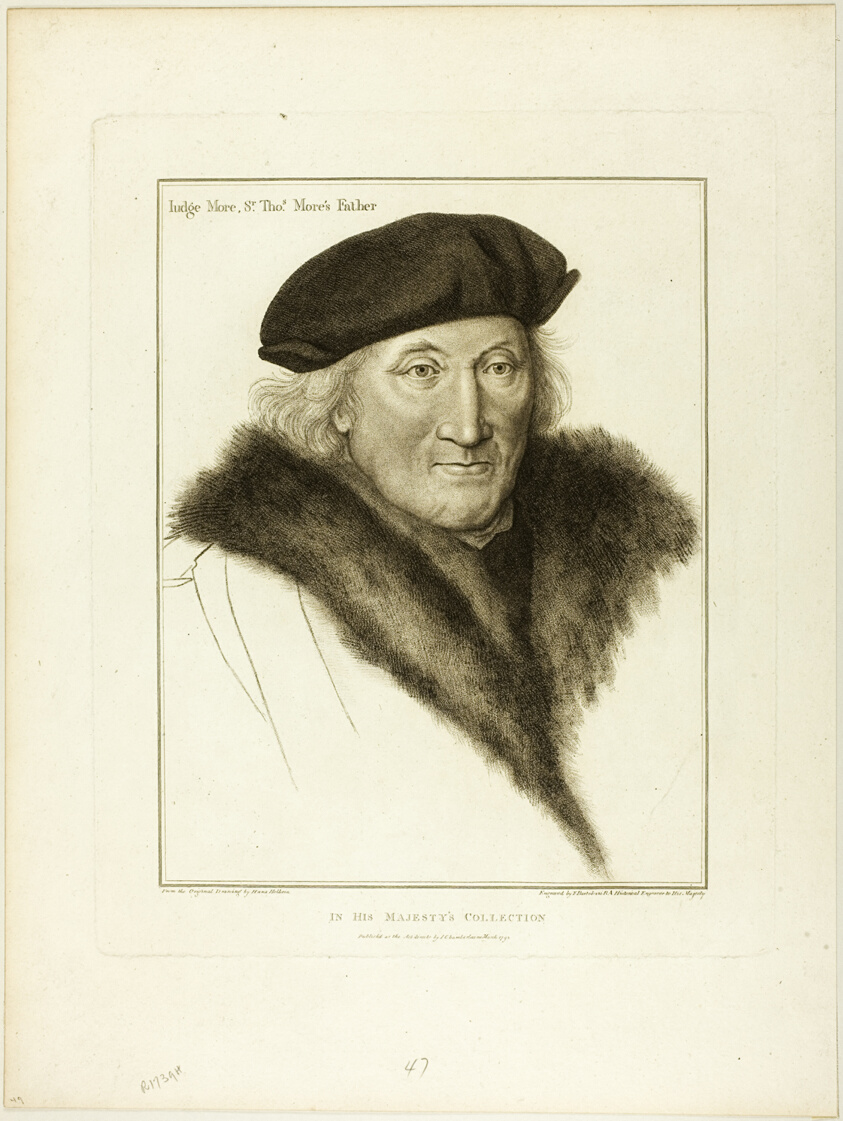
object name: Print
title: Judge More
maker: Francesco Bartolozzi (Italian, 1727-1815); after Hans Holbein the younger (German, 1497-1543)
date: March 1792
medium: Stipple engraving on cream wove paper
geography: Italy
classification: engraving; print; prints and drawing